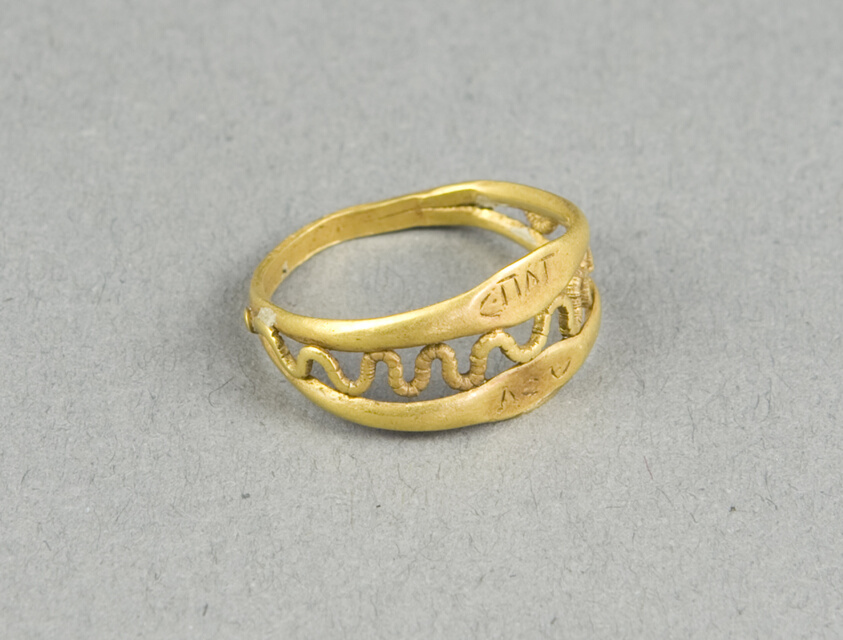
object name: Costume and Accessories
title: Openwork Ring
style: greco-roman (egyptian), ancient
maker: Greco-Roman, said to be found in Egypt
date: about 1st century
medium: Gold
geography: Egypt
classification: gold; metal; jewelry; ancient art; costume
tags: beauty, rituals